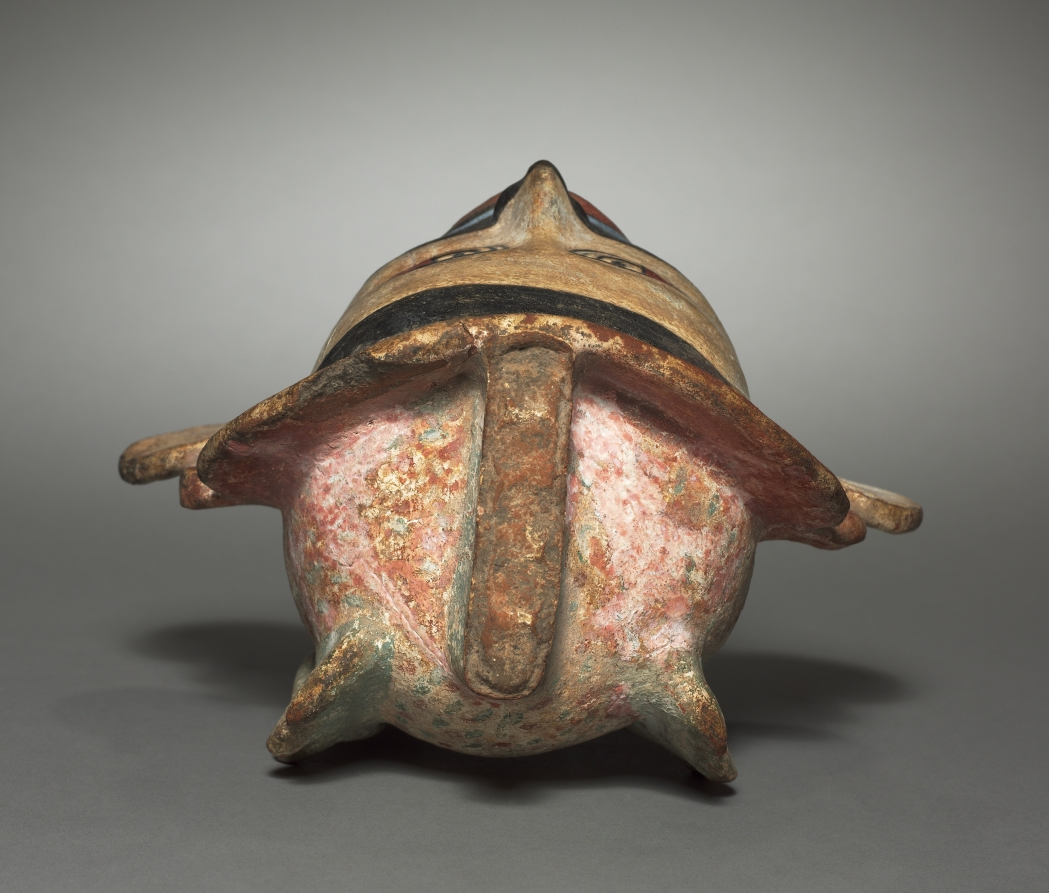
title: Head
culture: Mexico, Classic Veracruz (Totonac or Tajin)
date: 600–1100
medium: pottery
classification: Sculpture